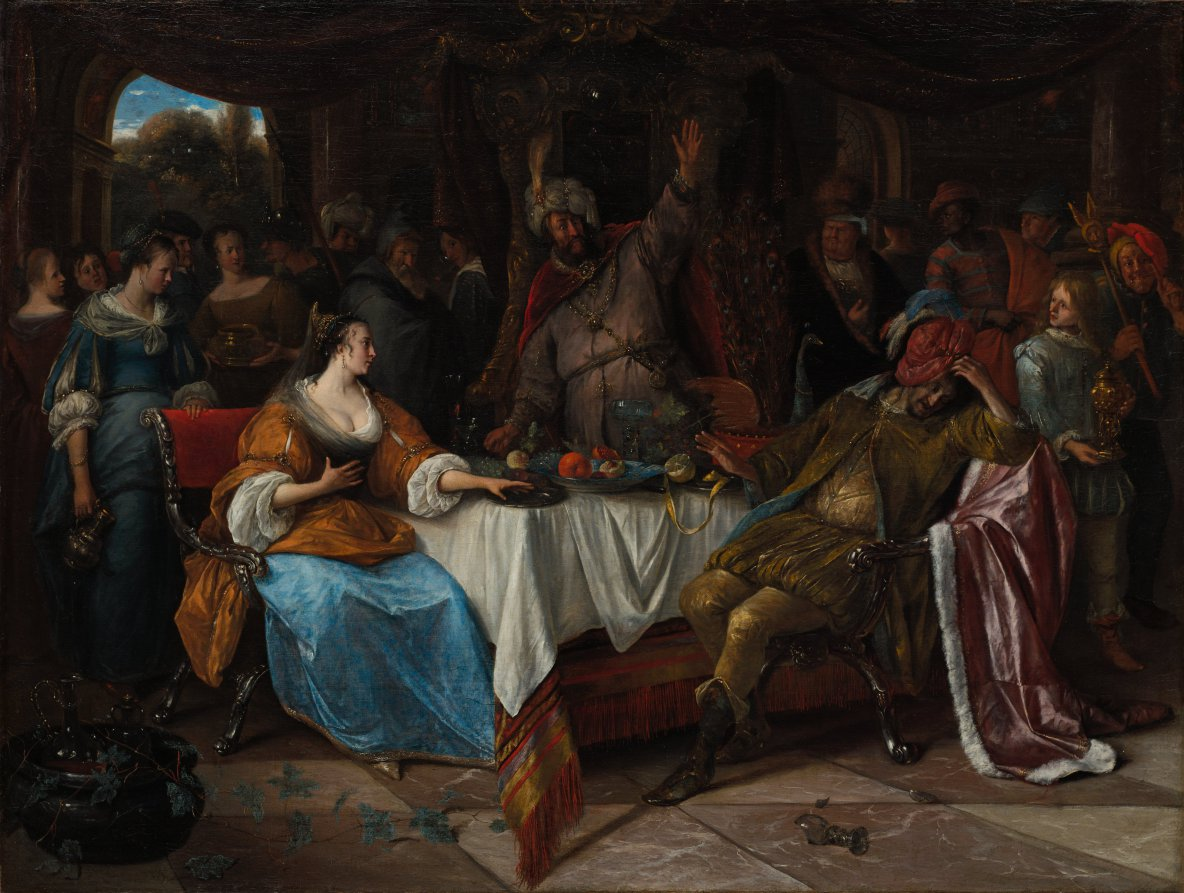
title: Esther, Ahasuerus, and Haman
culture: Netherlands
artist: Jan Steen (Dutch, 1626–1679)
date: c. 1668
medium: oil on canvas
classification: Painting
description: Esther, the wife of the Persian king Ahasuerus, effectively concealed her Jewish identity until the prime minister Haman hatched a plot to annihilate the kingdom’s Jews. To save her people Esther persuades the king (at the center) to rescind his order. He then turns against Haman, who slumps in his seat, aware of his sudden fall from power and his bleak future.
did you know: At the center of this biblical scene, Steen included elements of a typical Dutch still life: a Roemer glass, a half-peeled lemon, and a blue-and-white porcelain dish.